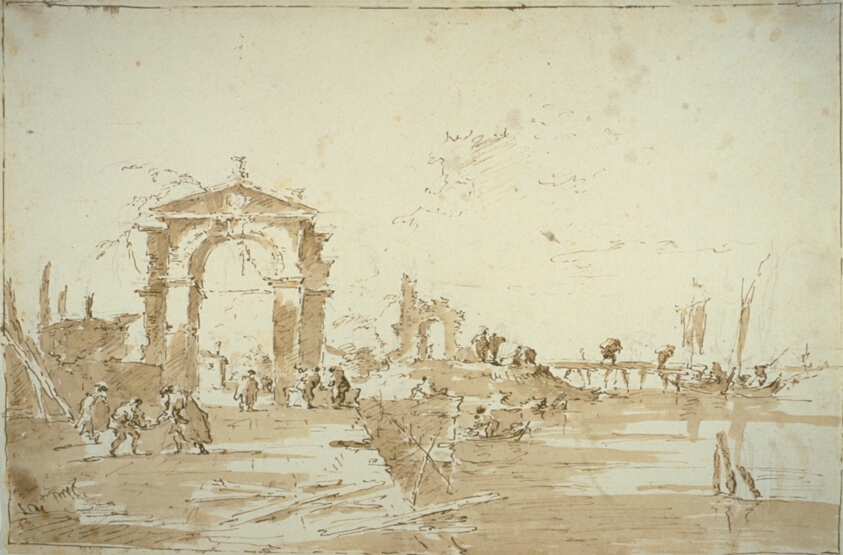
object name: Drawing and Watercolor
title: Gateway Near a Landing Bridge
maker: Francesco Guardi (Italian, 1712-1793)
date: 1780/85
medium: Pen and brown ink and brush and brown wash, over black chalk, on ivory laid paper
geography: Italy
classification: pen and ink drawings; drawings (visual works); prints and drawing